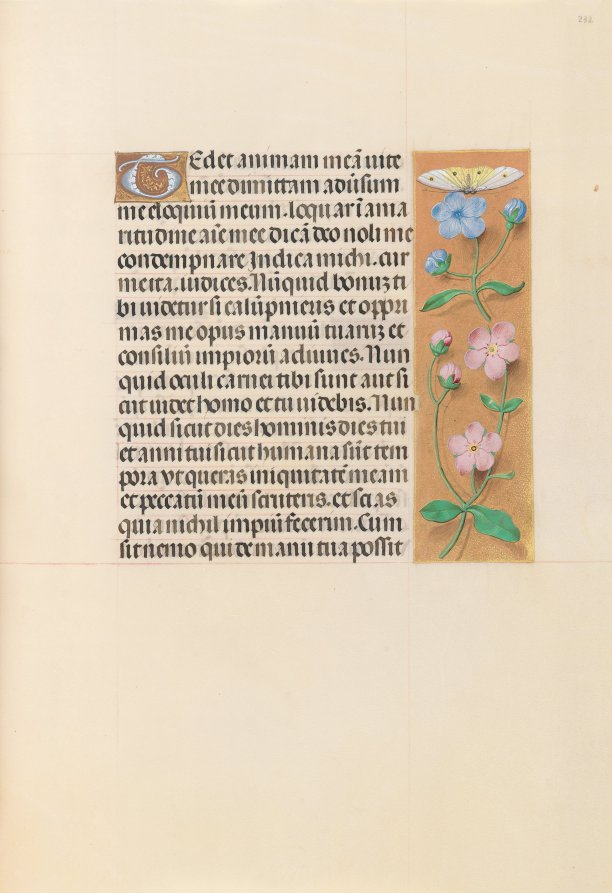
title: Hours of Queen Isabella the Catholic, Queen of Spain: Fol. 232r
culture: Flanders, Ghent and Bruges, late 15th century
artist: Master of the First Prayerbook of Maximillian (Flemish, c. 1444–1519)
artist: and Associates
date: c. 1500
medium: ink, tempera, and gold on vellum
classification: Bound Volume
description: This manuscript was illuminated by a circle of at least five highly organized manuscript painters active in the Flemish cities of Ghent and Bruges. The principal illuminator was Alexander Bening, who painted the majority of the book's miniatures. Manuscripts produced by this circle of artists are renowned for the decoration of their borders, which typically feature a rich variety of realistically-painted flowers, birds, and butterflies. This prayer book, called a book of hours, was intended not for a cleric, but for the private devotions of a lay person-in this case, Isabella the Catholic, Queen of Spain (1451-1504). Isabella's coat of arms embellishes the book's frontispiece. It is unlikely that the book was commissioned by the Queen herself; rather, she probably received it as a diplomatic gift from someone courting her patronage, perhaps Cardinal Francisco Jimenez de Cisneros. A Franciscan friar, Jimenez was dependent upon Isabella for his advancement, first to the post of Queen's confessor in 1492, and then to Archbishop of Toledo in 1495.